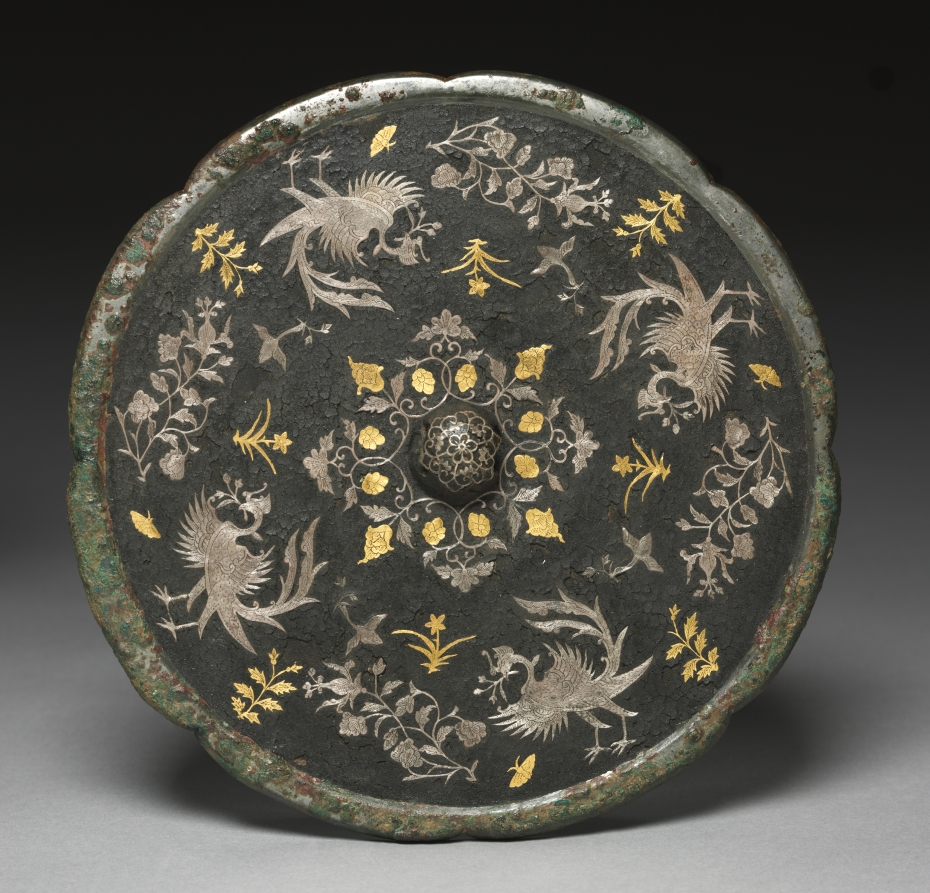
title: Mirror with Phoenixes, Birds, Butterflies, and Floral Sprays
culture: China, Tang dynasty (618-907)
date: 700s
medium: bronze with silver and gold inlaid lacquer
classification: Metalwork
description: This extremely rare pingtuo mirror is coated with a lacquer base inlaid with paper-thin sheets of silver and gold. The decorative patterns, especially the floral arabesques and the phoenixes and birds holding branches in their mouths, have a pronounced Persian and Central Asian flavor. Luxury items like this had been used by the Tang emperor as diplomatic gifts. A similar example from the Japanese imperial collection of Emperor Shōmu was donated by Empress Kōmyō in 756 to the Shōsō-in repository of the Tōdai-ji Temple, Nara, Japan.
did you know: Mirrors like this have a polished side for viewing and a decorated side with a central knob for lifting.